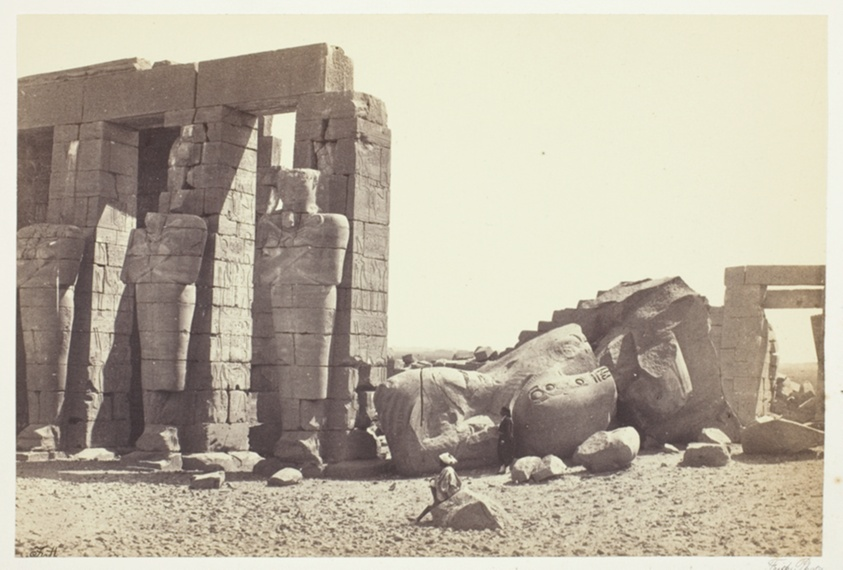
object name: Photograph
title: Osiride Pillars and Great Fallen Colossus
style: 19th century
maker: Francis Frith (English, 1822–1898)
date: c. 1857, printed 1862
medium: Albumen print, from the album "Egypt, Palestine and Nubia" (1862)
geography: England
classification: albumen silver print; photographic process; photography; photograph